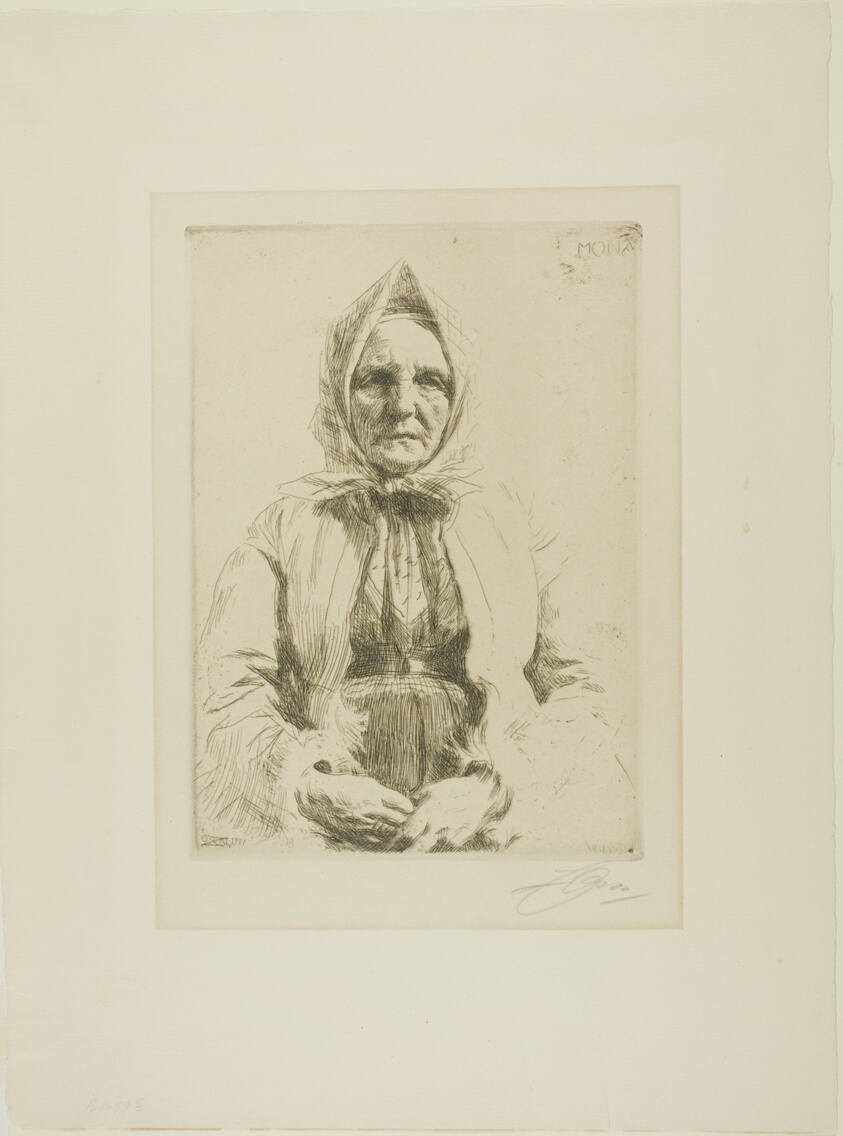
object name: Print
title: Mona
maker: Anders Zorn (Swedish, 1860-1920)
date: 1911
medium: Etching on ivory laid paper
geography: Sweden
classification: etching; print; prints and drawing